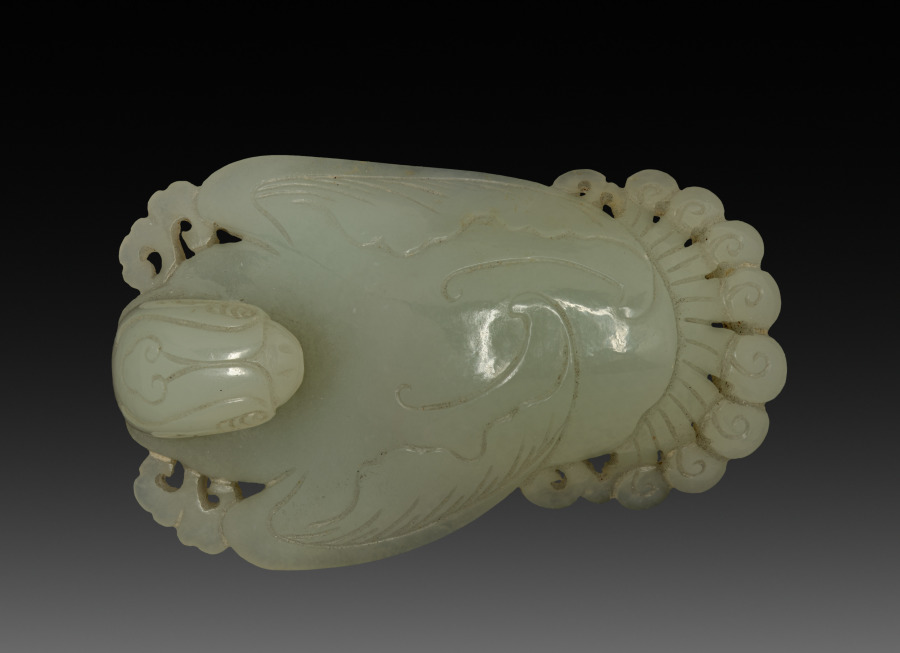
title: Buckle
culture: China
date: 1800s–1900s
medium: white jade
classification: Jewelry